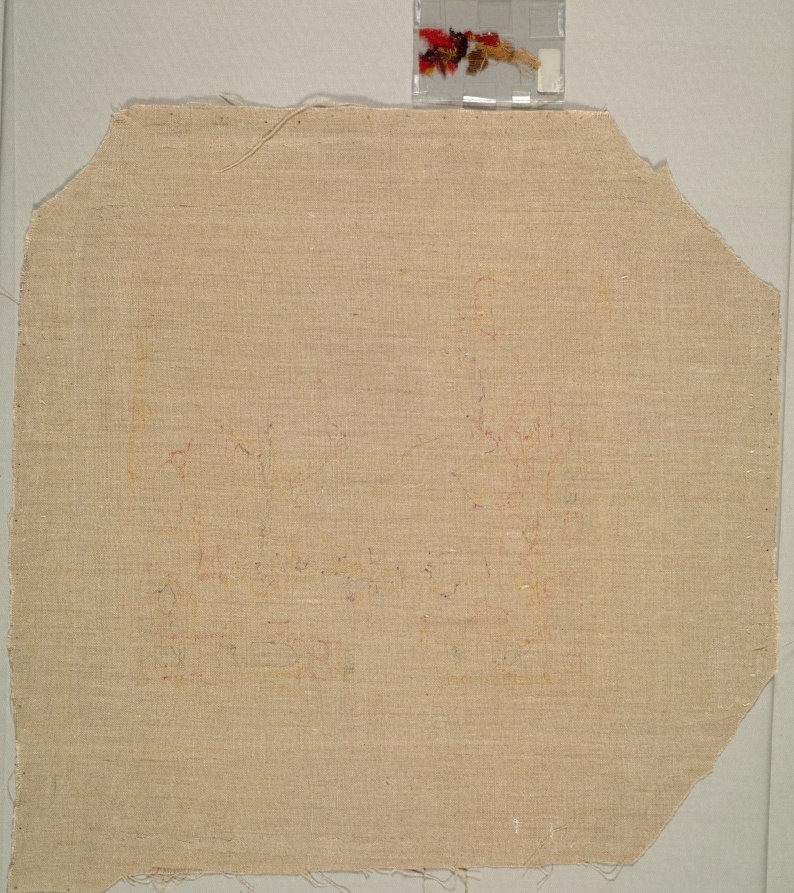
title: Two Figures Framed by a Jeweled Border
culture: Byzantine Empire (Egypt)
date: 450–550 CE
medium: wool, linen, and dye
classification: Textile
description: This weaving depicts a haloed man and woman. However, it once had a third figure at left. The textile was damaged before its 1979 acquisition; only the third figure’s partial halo and shoes remained. Staff decided to “close the gap” around the missing area and remove the shoes. While creating a “complete” image, that removal affects our ability to understand the weaving’s subject. Many questions remain: Who are the man and woman? His red cap may identify him as an “Easterner” or a freeman. Who was their missing companion? Continuing research will consider biblical and Greek mythological stories in which threads play a role.